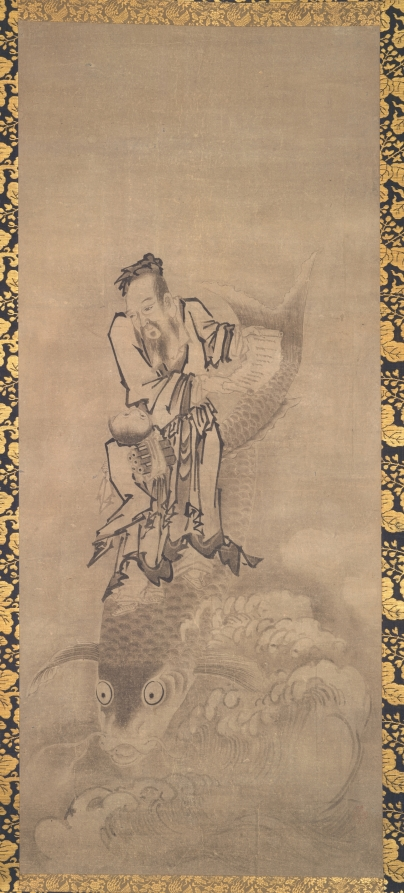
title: Hotei with Daoist Immortals: Immortal Riding Carp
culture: Japan, Edo period (1615–1868)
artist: Kyūseki Tomonobu (Japanese, 1653–1721)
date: late 1600s-early 1700s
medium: triptych of hanging scrolls: ink on paper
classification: Painting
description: Hotei was a Chan (Japanese: Zen) monk living in China during the 900s who, in the 1300s, became a legendary figure in Japan. At that time a popular cult praising him sprang up, extending beyond Zen to other religious communities. This rare triptych embraces a central Zen icon with flanking Daoist images, thereby suggesting the compatibility, rather than the exclusivity, of these two creeds. Hotei also enjoys popularity in Japan as a kind of genre, or folk figure, which explains his mirthful expression in Japanese paintings. The Daoist figures in contrast appear eccentric and foreign-looking, in keeping with Daoist lore. When these paintings came to the museum their appearance was compromised by poor quality textile mountings and cracked paper surfaces deserving of restoration. The fact that these scrolls constituted an integral set that properly had to be shown as a unit heightened the need to stabilize their condition and improve their presentation for museum visitors. A complete remounting of each scroll occurred following the cleaning of the paper surfaces and the repair of the lifting surface areas. No inpainting was done, thereby preserving the original ink values and brushstrokes.